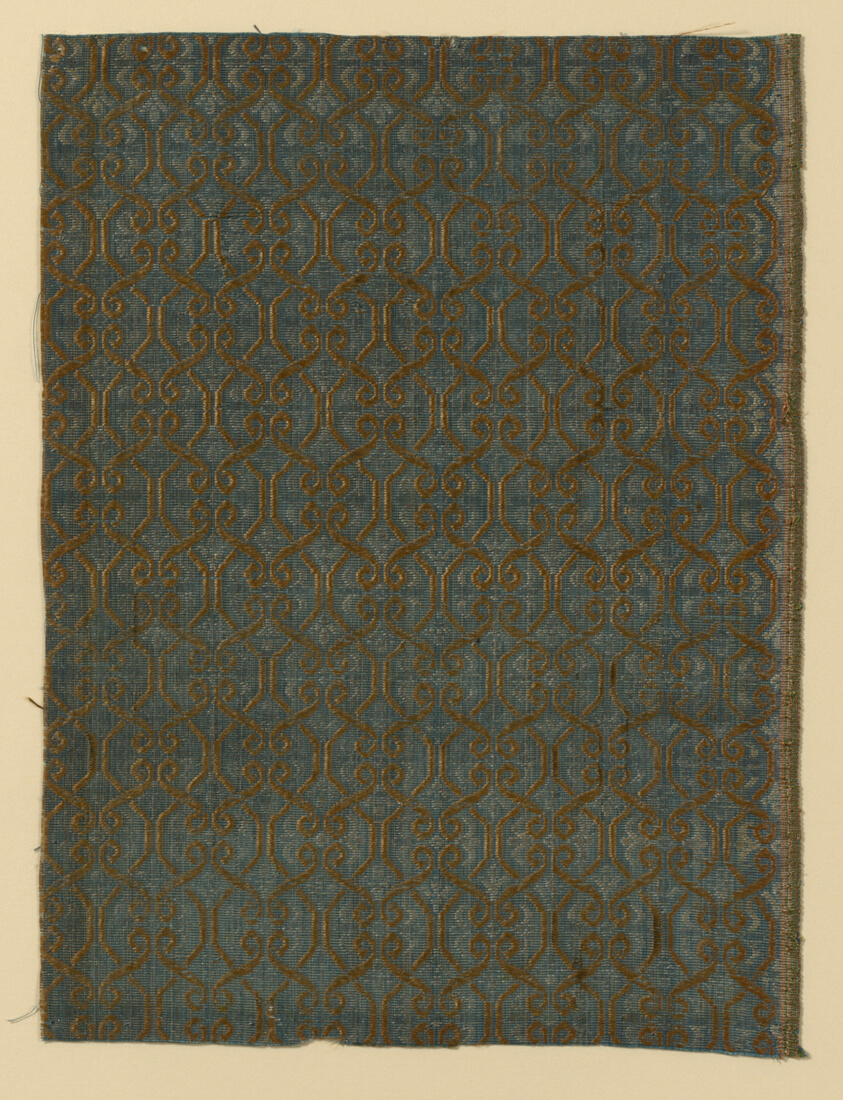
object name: Textile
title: Fragment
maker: Italy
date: 17th century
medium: Silk, plain weave with self-patterning ground wefts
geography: Italy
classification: textile; weaving